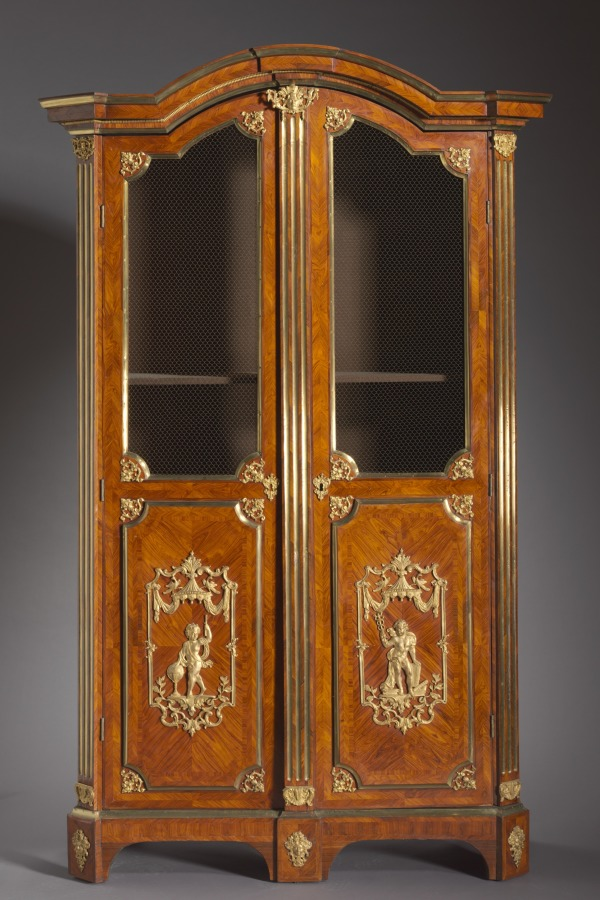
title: Pair of Bookcases (Bibliothèques)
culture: France, 18th century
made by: attributed to Charles Cressent (French, 1685–1768)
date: c. 1720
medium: kingwood and rosewood veneers, gilt metal mounts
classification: Furniture and woodwork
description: One of the obligations of a wealthy existence in the early 1700s was an interest in reading, or at least the impression of developing such an interest. Large bookcases such as these helped in that pursuit as they kept elaborately leather-bound books neatly behind a screen. The broad panels of marquetry and gilt-bronze mounts below suggest that the overall decorative scheme of figures symbolizing Geography and Commerce was perhaps more prominent than the rich intellectual holdings within.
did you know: Pairs of bookcases such as these would have likely flanked a large fireplace within the library of a grand house.